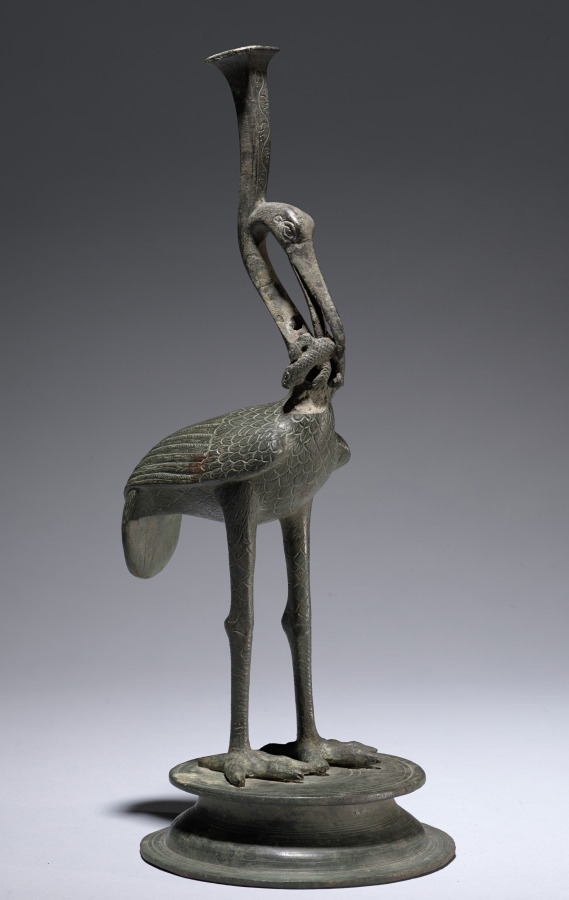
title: Ibis Eating a Lizard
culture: Italy, Rome, Roman Empire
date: 100 BCE–100 CE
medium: bronze, hollow cast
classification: Sculpture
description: The ibis is an Egyptian bird, shown here standing firmly on both legs with a lizard in its beak. The bird rests on a two-tiered circular base, and a vertical stem with incised decoration extends above the ibis’s head. While an Egyptian animal, the image of the ibis devouring a lizard became common only in the Roman world, depicted in wall paintings and seen on Barbotine ware, a type of pottery. This sculpture may be unique, however, in showing this motif in the round.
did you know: This sculpture was possibly used as a support for furniture, a candelabrum, or an incense burner.